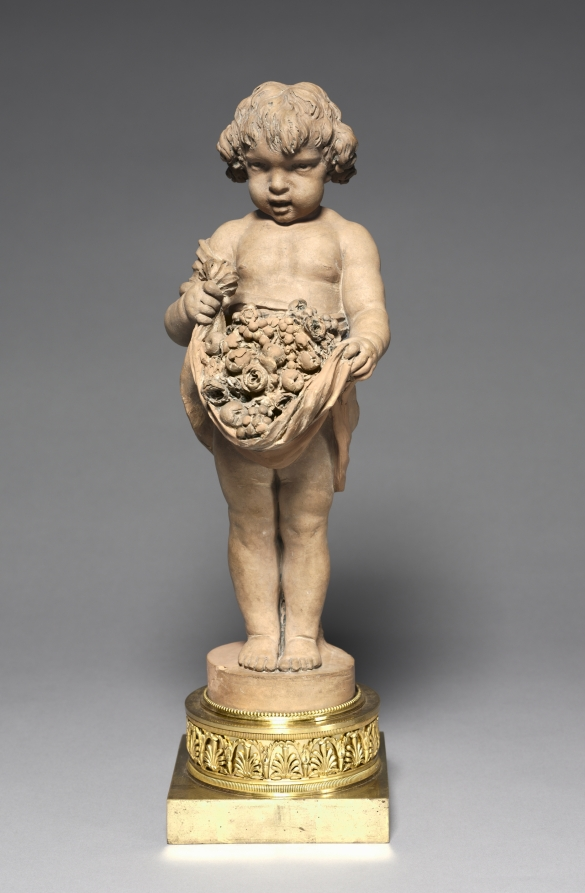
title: Child Carrying Fruit and Flowers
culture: France, 18th century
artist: Clodion (French, 1738–1814)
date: 18th-early 19th century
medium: terracotta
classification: Sculpture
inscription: Signed: "Clodion"; signature incised on back in the terracotta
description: French sculptor Claude Michel, called Clodion, frequently depicts children in his sculpture, in this case a convincing toddler, from her pout to her plump toes. The piece is constructed in terracotta, a common medium for Clodion. After firing, the unglazed color of the clay can vary widely; each of Clodion's statues has a slightly different hue. The figure has sustained a number of damages, but has recently been cleaned and repaired.